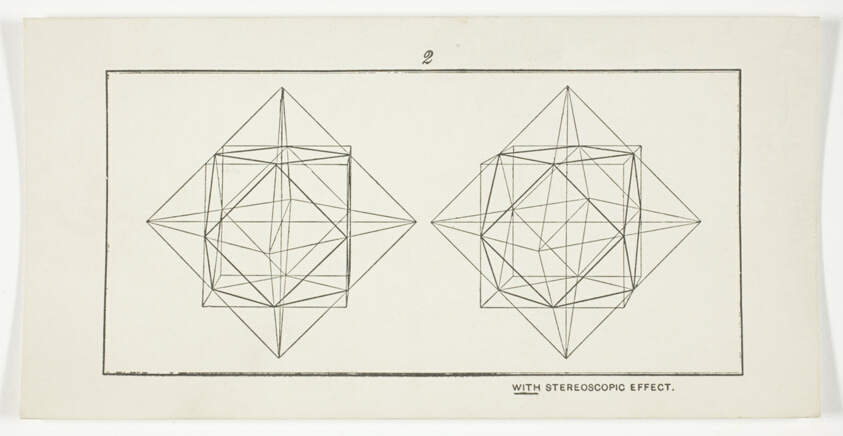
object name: Photograph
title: With Stereoscopic Effect 2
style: 19th century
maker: Artist unknown; American, late 19th century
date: 1875/99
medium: Photolithograph, stereo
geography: United States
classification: photography; photograph